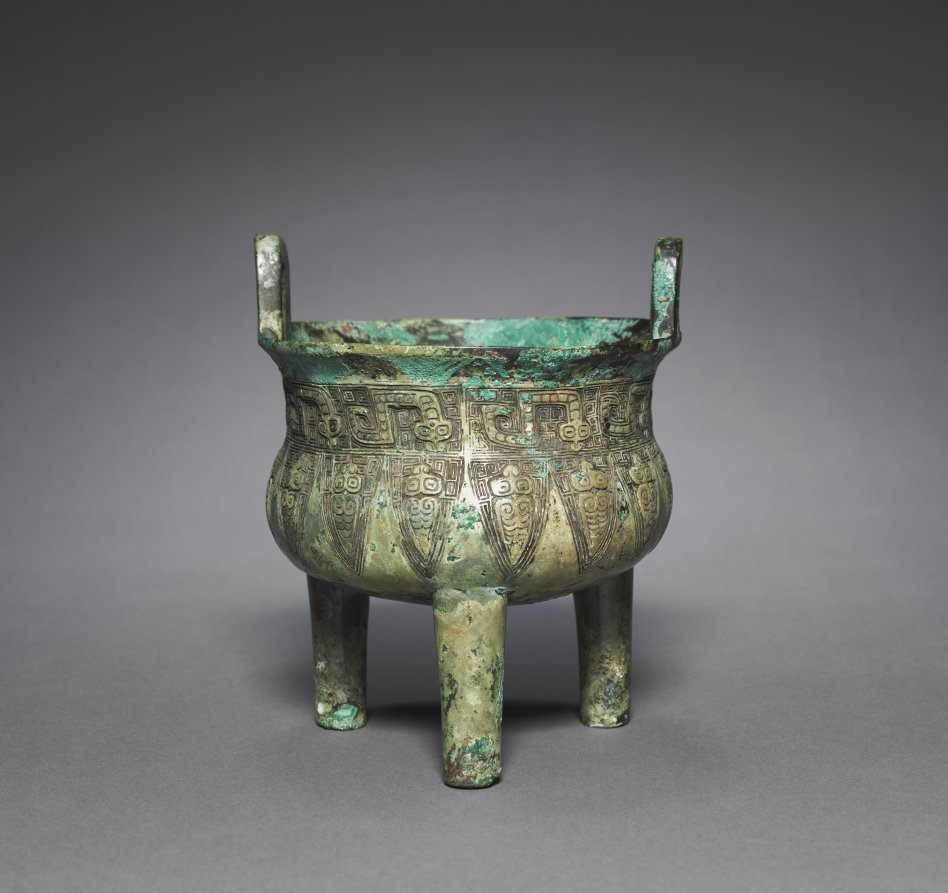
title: Tripod Cauldron (Ding)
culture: China, Shang dynasty (c. 1600–c. 1046 BCE)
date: 1200–1100 BCE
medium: bronze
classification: Metalwork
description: In ancient China, bronze tripods of the type called ding were made in sets of different sizes to be used in rituals in which grain and meat was offered to the spirits of the ancestors. These bronzes were subsequently both collected items and major scholarly preoccupations in Chinese history. They were prized art treasures that provide source materials for Chinese historiography and antiquity studies. Catalogues of archaic bronzes have been published since the Song dynasty. Scholars studied the bronze inscriptions, typologies, and terminologies, and these studies exerted an impact in the field well before the birth of modern art history and archaeology.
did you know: The vessel shows a band of silkworms and cicadas in two registers.